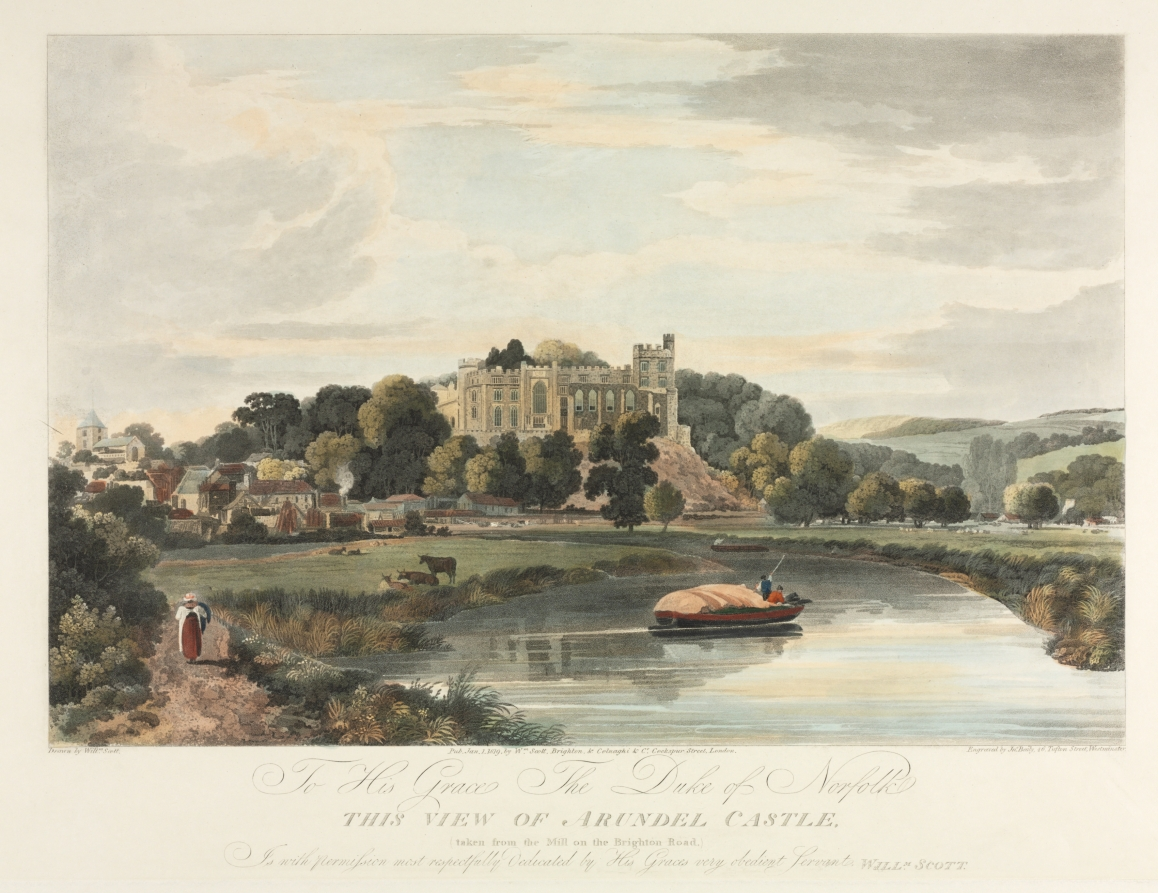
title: This View of Arundel Castle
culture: England, 19th century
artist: John Baily (British)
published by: Wm Scott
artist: after William Scott (British)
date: 1819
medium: color aquatint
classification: Print